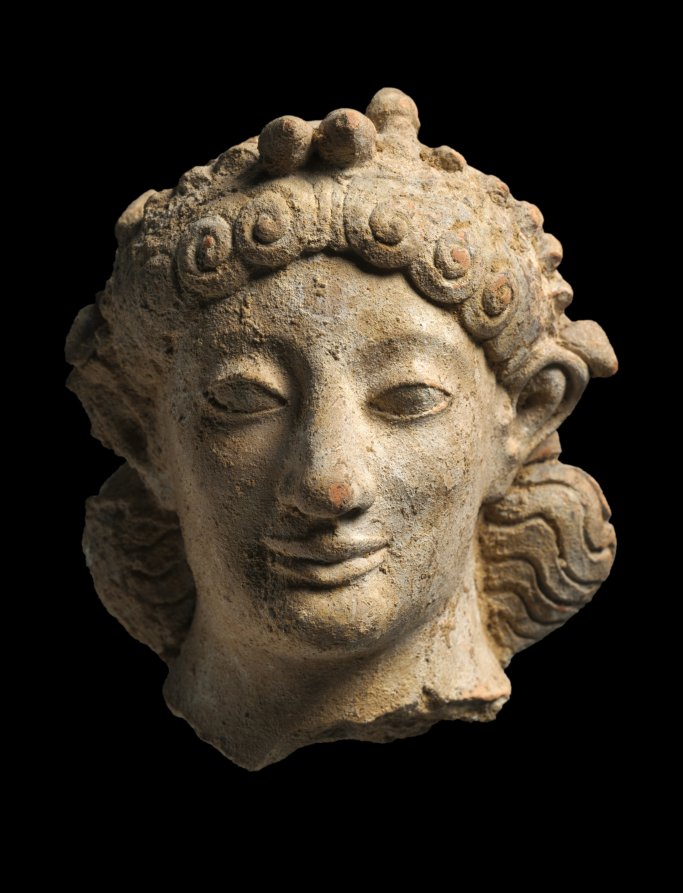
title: Head of Artemis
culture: Greece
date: 600–575 BCE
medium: terracotta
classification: Sculpture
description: Artemis was the goddess of hunting. Her long straight nose, almond-shaped eyes, and "archaic smile" are very similar to those of Atalanta on the contemporary white-ground lekythos (1966.114)